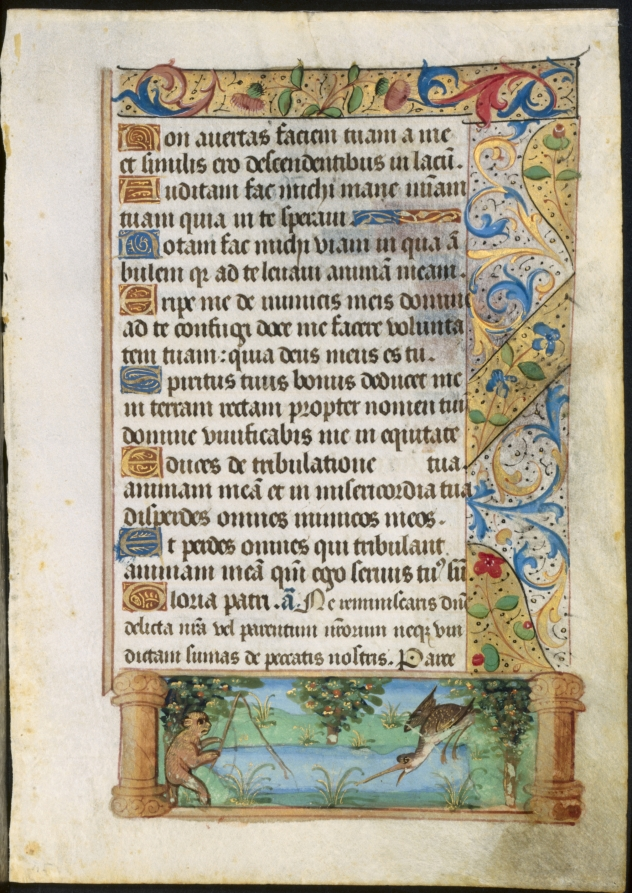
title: Leaf from a Book of Hours: Ape Fishing (verso)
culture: France, Paris or Rouen, 16th century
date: c. 1500–1510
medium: ink, tempera and liquid gold on vellum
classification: Manuscript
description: This leaf shows the second half of Psalm 142. The page’s first line reads, “Non avertas faciem tuam a me,” or “Turn not away thy face from me.” This last page of the penitential psalms immediately precedes the litany of saints, which begins on the other side of this leaf. Below the text stands an ape fishing at a small pond across from a large bird, a scene possibly from a fable or simply meant to be amusing or diversionary.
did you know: The ape and the wild boar symbolized vice in general and lust in particular during the Middle Ages.